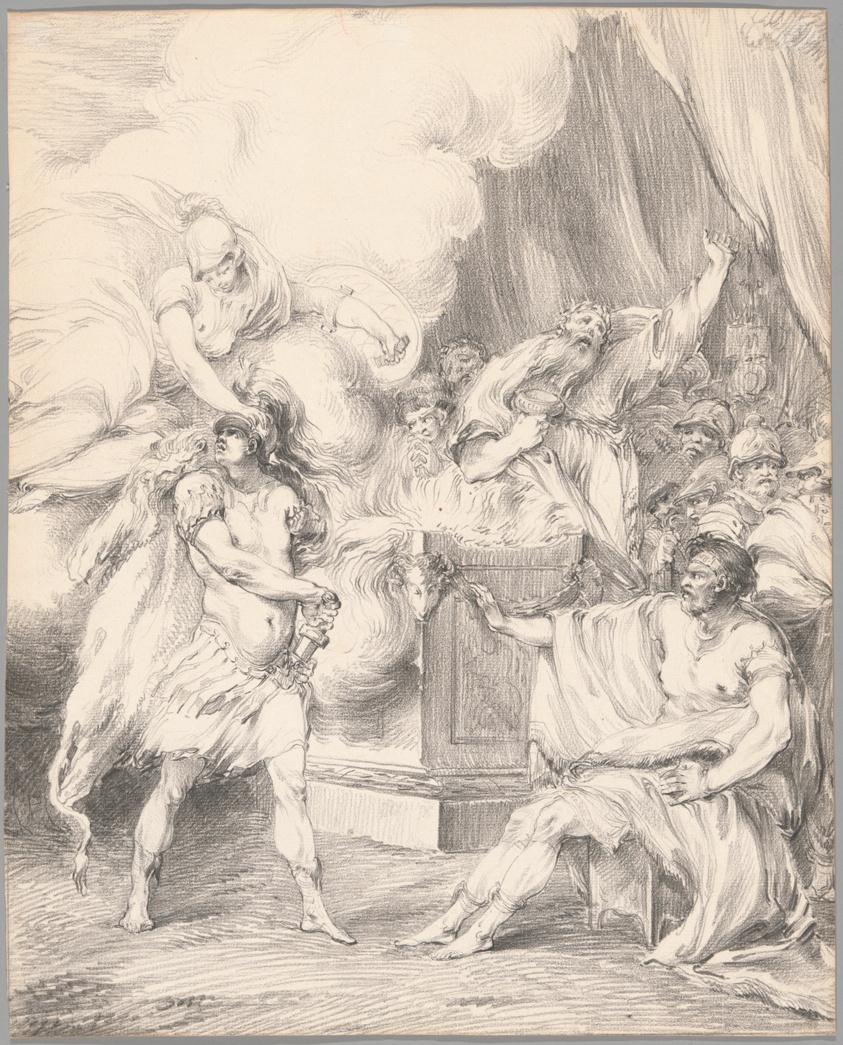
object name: Drawing and Watercolor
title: Achilles Restrained by Athena in Agamemnon's Tent, from Iliad, Book I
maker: Johan Tobias Sergel (Swedish, 1740-1814)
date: 1765/66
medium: Black chalk on cream laid paper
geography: Sweden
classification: drawings (visual works); chalk; paper; prints and drawing